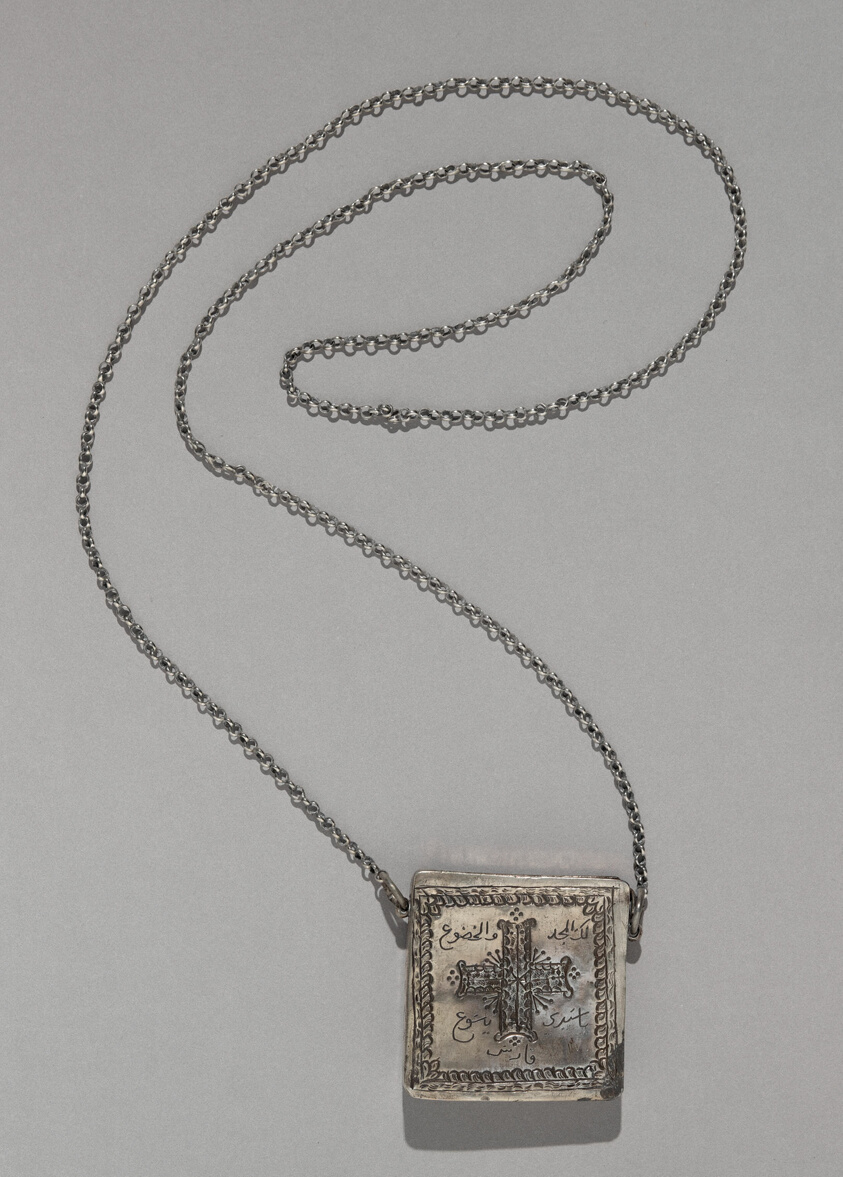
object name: Costume and Accessories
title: Necklace with a Compartment for Magical Texts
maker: Turkey or Egypt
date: Ottoman dynasty (1299–1923), 18th/19th century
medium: Silver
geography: Nestórion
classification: jewelry; european decorative arts; costume